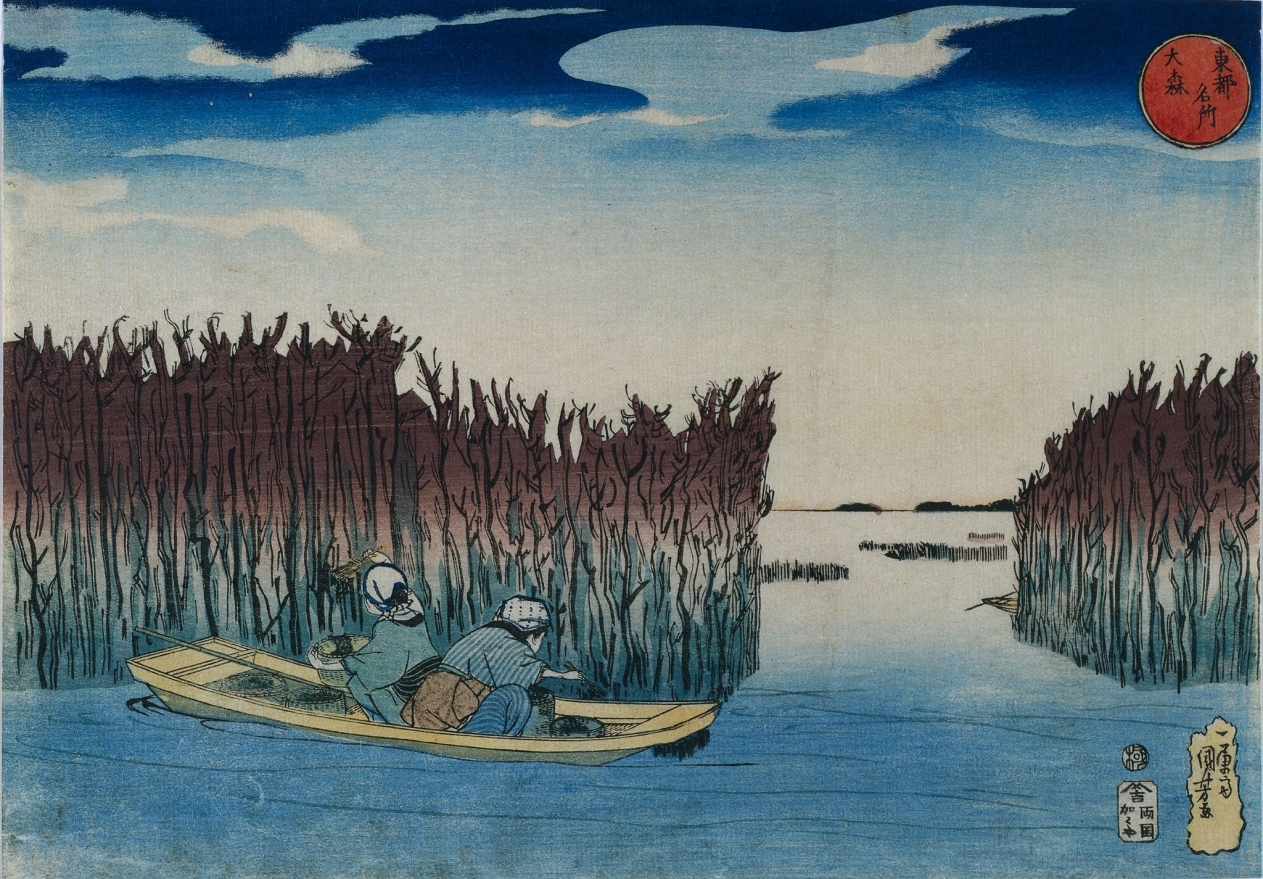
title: Ōmori, from the series Famous Places in the Eastern Capital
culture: Japan, Edo period (1615–1868)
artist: Utagawa Kuniyoshi (Japanese, 1797–1861)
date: early 1830s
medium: Color woodblock print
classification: Print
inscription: Signature: Ichiyusai Kuniyoshi ga. Publisher: Kagaya Kichibei (Kagaya, Ryogoku, emblem). Censorship Seal: kiwame.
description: Sites around Edo (present-day Tokyo) were popular subjects of ukiyo-e (pictures of the floating world) prints in the early 1800s. The calligraphy in the red circle on the upper right is the title of the series, The Famous Places in the Eastern Capital. The Ōmori district, on Edo Bay a few miles south of Edo, was known for its cultivation of nori, the crackly sheets of seaweed commonly wrapped around rice balls or sushi rolls. Utagawa Kuniyoshi depicted two women gathering seaweed from cultivation beds. One uses chopsticks, while the other gently rakes the seaweed into the baskets in their boat. The tip of another skiff behind the stand of plants on the right and the cultivation beds in the distance suggest the scale and importance of this industry.